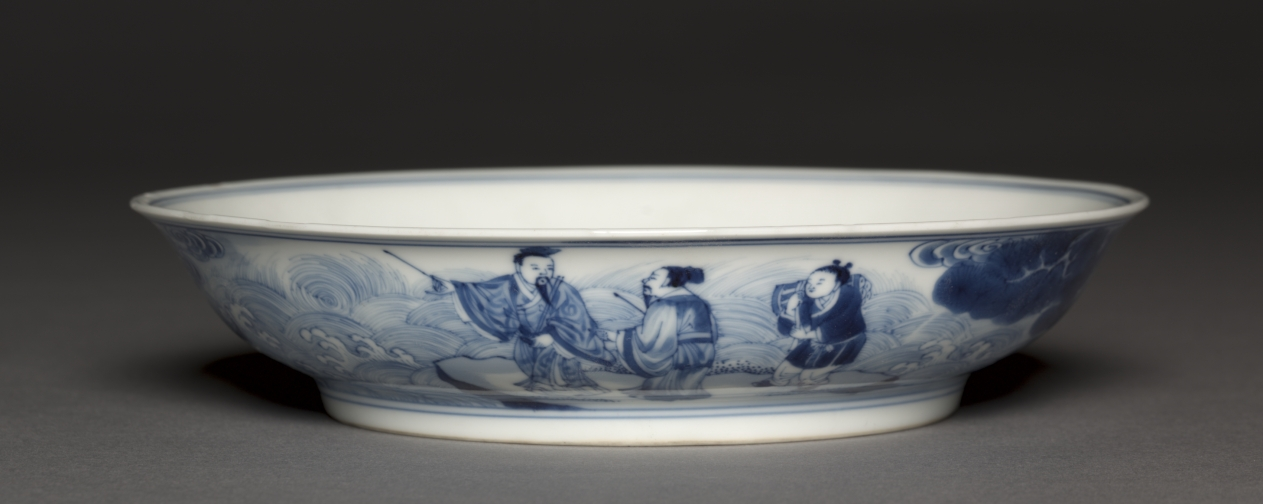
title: Dish with Laozi Riding a Water Buffalo (interior); Pavilion and Immortals in Rocky Landscape (exterior)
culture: China, Jiangxi province, Jingdezhen kilns, Qing dynasty (1644-1911), Yongzheng reign (1723-35)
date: 1723–35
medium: porcelain with underglaze blue decoration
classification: Ceramic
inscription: 大明成化年製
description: Daoism traces its origins to Laozi, a sage believed to have lived in the sixth century BC, who was the reputed author of the Daode jing (Classic of the Way), a fundamental text for Daoism. The interior of this dish depicts the elderly Laozi riding a buffalo. He is accompanied by three servants and is greeted by a scholarlike figure. This dish borrows brush and shading techniques typically employed by artists who paint on paper or silk, a development frequently seen in porcelain decoration around the 1700s.